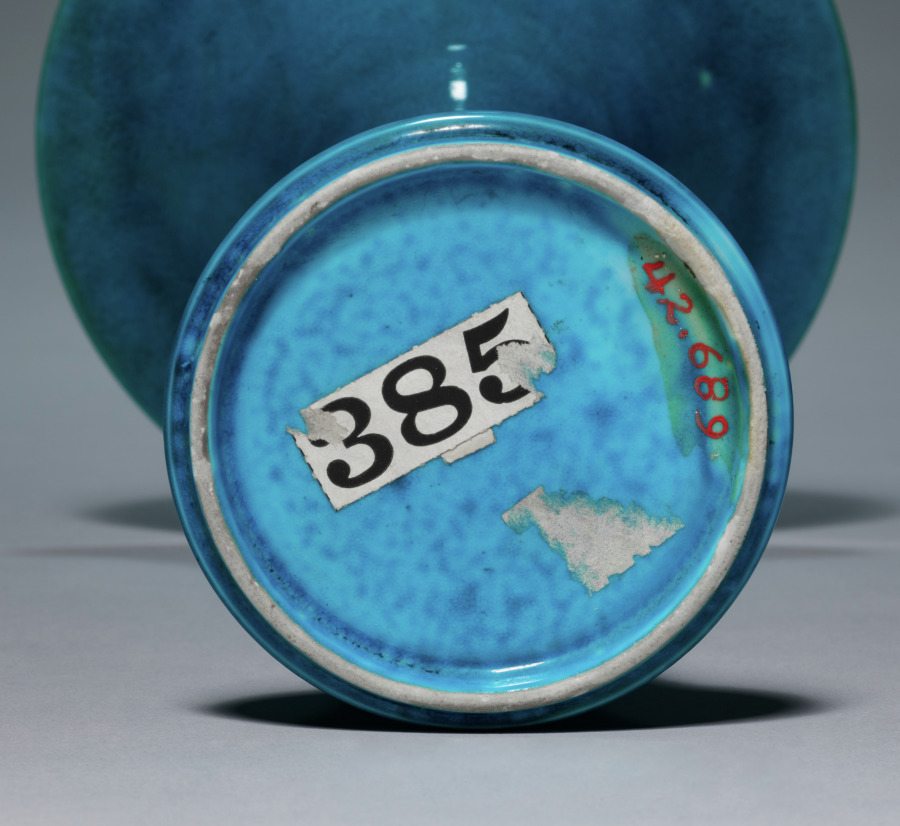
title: Beaker Vase in Form of Archaic Gu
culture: China, Jiangxi province, Jingdezhen kilns, Qing dynasty (1644-1911), Kangxi mark and reign (1662-1722)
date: 1662–1722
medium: porcelain with peacock-blue glaze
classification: Ceramic